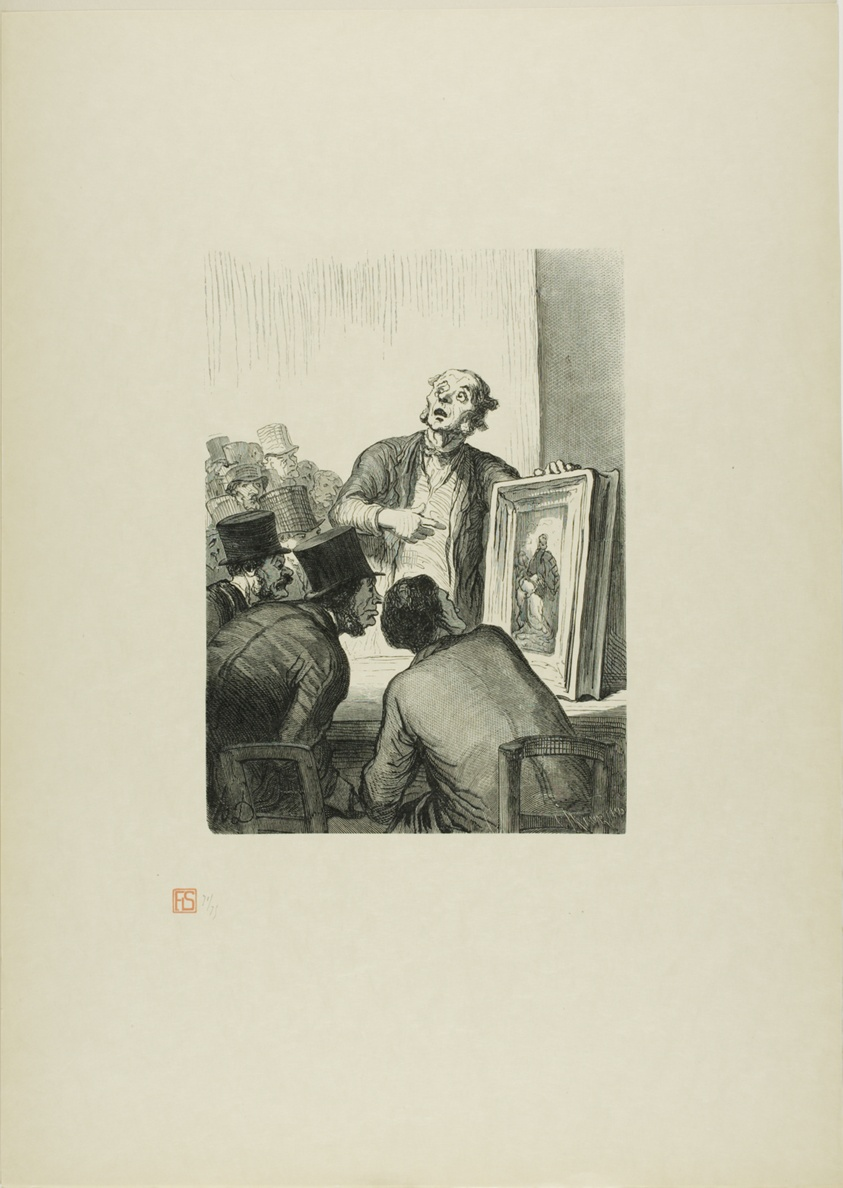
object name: Print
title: The Auction House: The Expert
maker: Charles Maurand (French, 1824-1904); after Honoré Victorin Daumier (French, 1808-1879); printed by François Louis Schmied (Swiss, 1873-1941); published by Jules Meynial (French, 20th century)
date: 1863, printed 1920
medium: Wood engraving on cream Japanese paper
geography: France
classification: wood engraving; print; prints and drawing